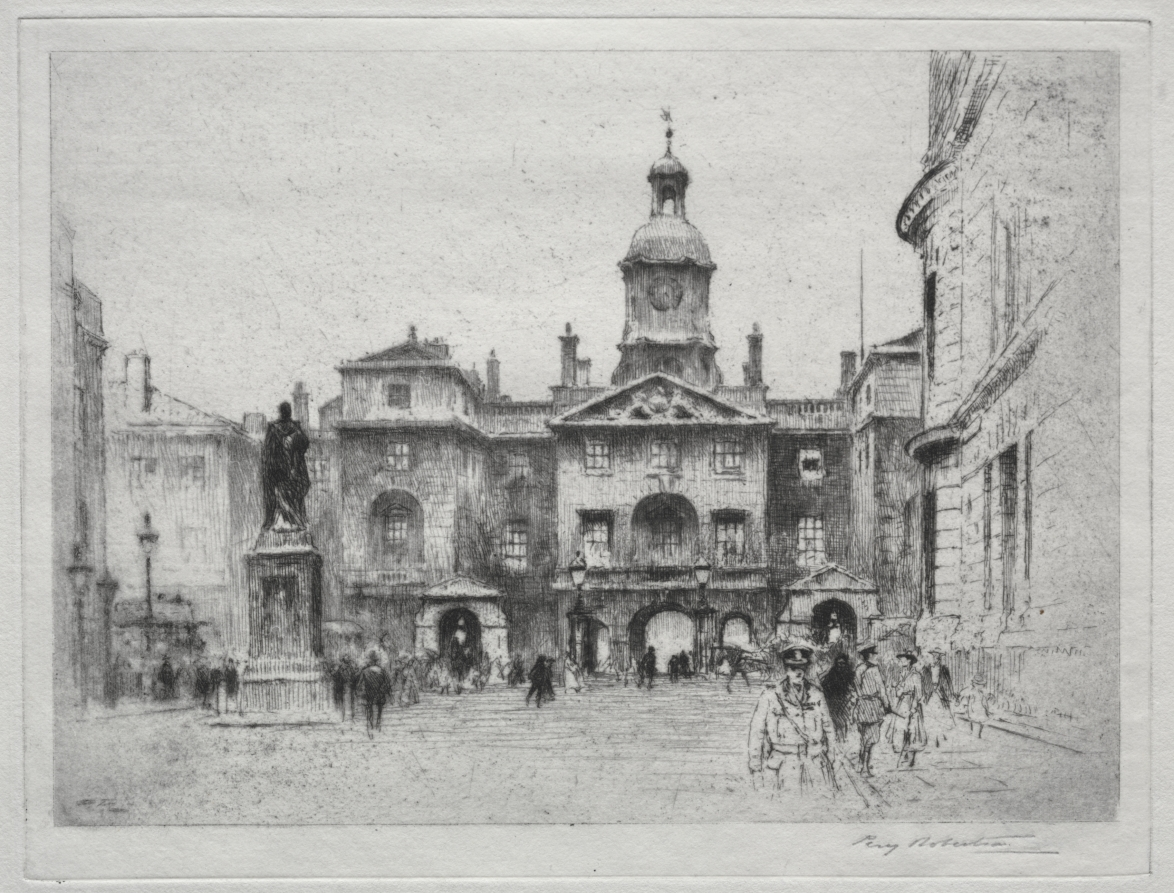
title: Horse Guards, Whitehall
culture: England, 19th-20th century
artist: Percy Robertson (British, 1868–1934)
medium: etching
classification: Print